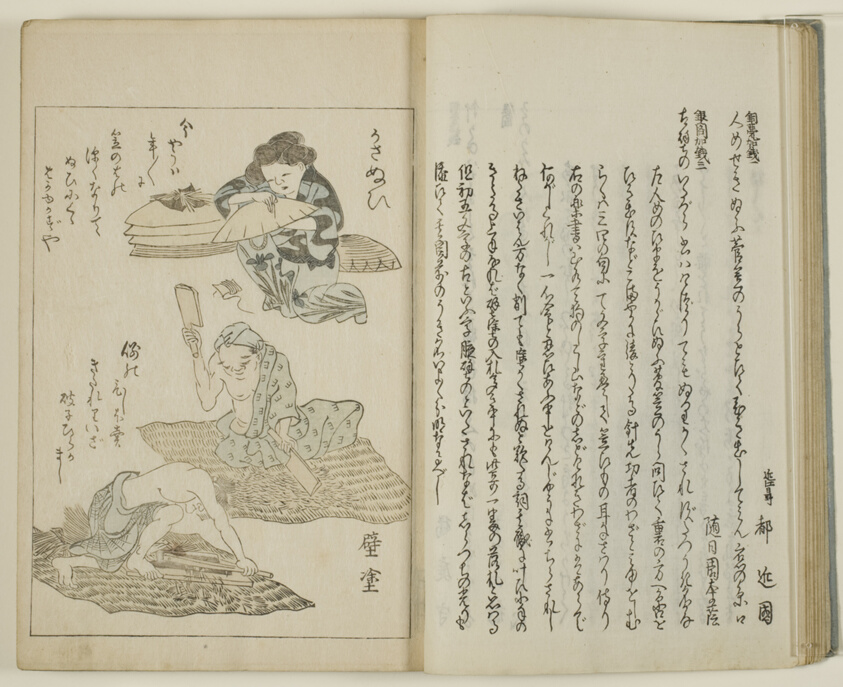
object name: Book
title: Imayo shokunin zukushi uta awase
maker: Kitao Masayoshi (Japanese, 1764–1824)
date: Unkown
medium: Woodblock printed book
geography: Japan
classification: book; asian art